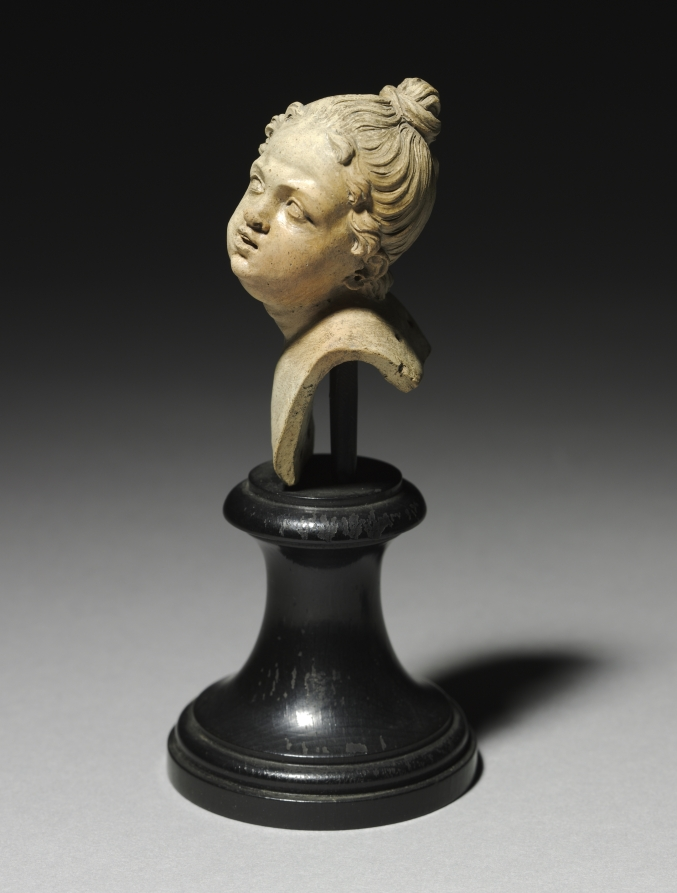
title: Head of a Woman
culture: Italy, Naples (?), early 19th Century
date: c. 1800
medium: terracotta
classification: Sculpture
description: Each of these miniscule terracotta busts has allegedly been formed by hand, though the precision of the detailed features implies that they have been cast from a mold. Details such as the meticulously executed facial features and the thin, exact rows of hair on each figure suggest a manufactured method of creation, yet the pair is deemed handmade. Furthermore, these figures lack any trace of fingerprints that handmade figures of this time typically bear. Small holes at the base of each bust suggest that the heads were once attached to bodies that may have been used as crèche figurines. The busts were created in Naples where large numbers of nativity scenes were produced around the turn of the nineteenth-century. The similarity in size to archetypal terracotta crèche figurines, as well as the vast production of nativities in Naples at this time lends to the possibility that these busts were created for a nativity scene.